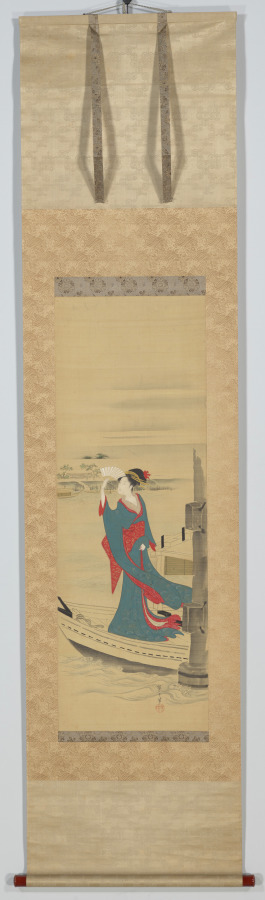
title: Beauty in a Boat on Sumida River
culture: Japan, Edo period (1615–1868)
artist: Chōbunsai Eishi (Japanese, 1756–1829)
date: c. 1801–4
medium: hanging scroll; ink and color on silk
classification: Painting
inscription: artist's signature 栄之筆 and seal, lower right.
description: The Sumida River was a popular refuge from the heat and humidity of the city during the summer. One can see the torii gate of Mimeguri Shrine just to the left of the woman's fan.